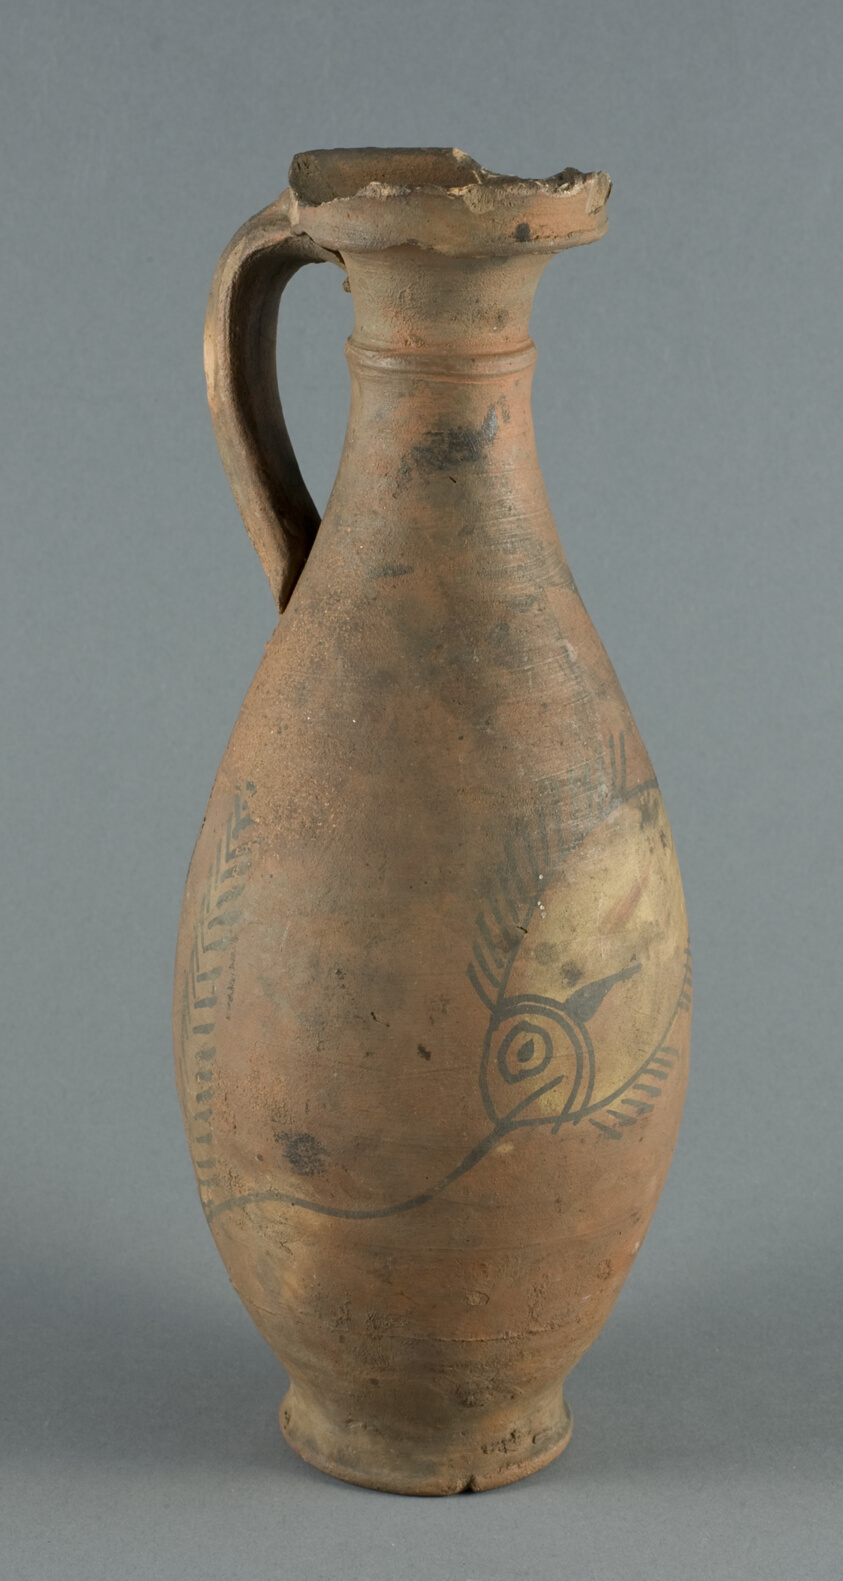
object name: Vessel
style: egyptian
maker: Egyptian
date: Roman Period (1st century BCE–4th century CE)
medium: Ceramic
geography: Egypt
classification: vessel; ceramics; ancient art